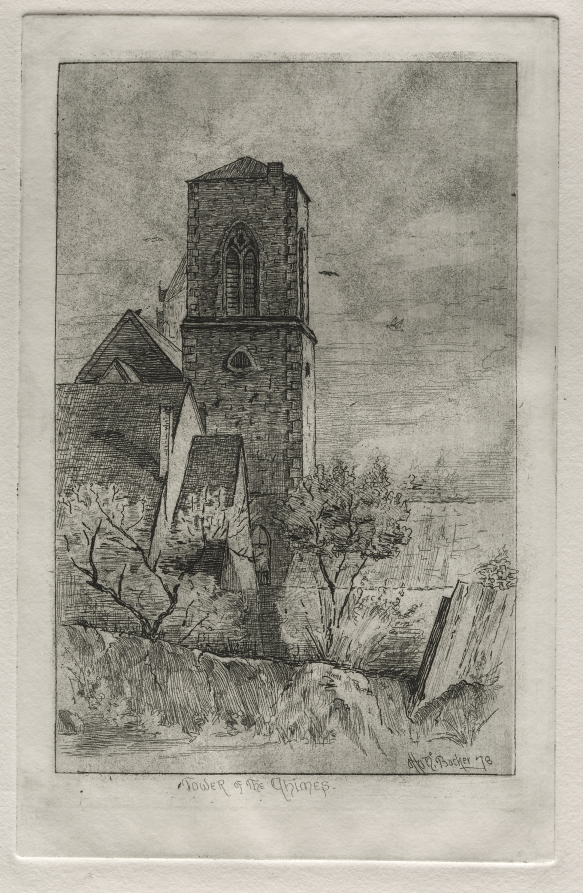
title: Tower of the Chimes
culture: America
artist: Otto H. Bacher (American, 1856–1909)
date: 1878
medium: etching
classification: Print